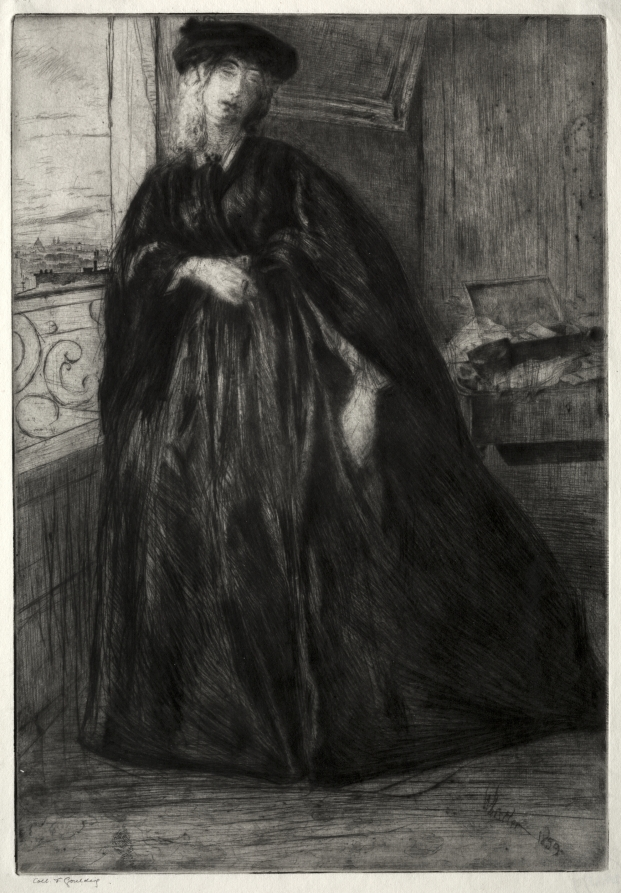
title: Finette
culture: America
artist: James McNeill Whistler (American, 1834–1903)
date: 1859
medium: etching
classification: Print